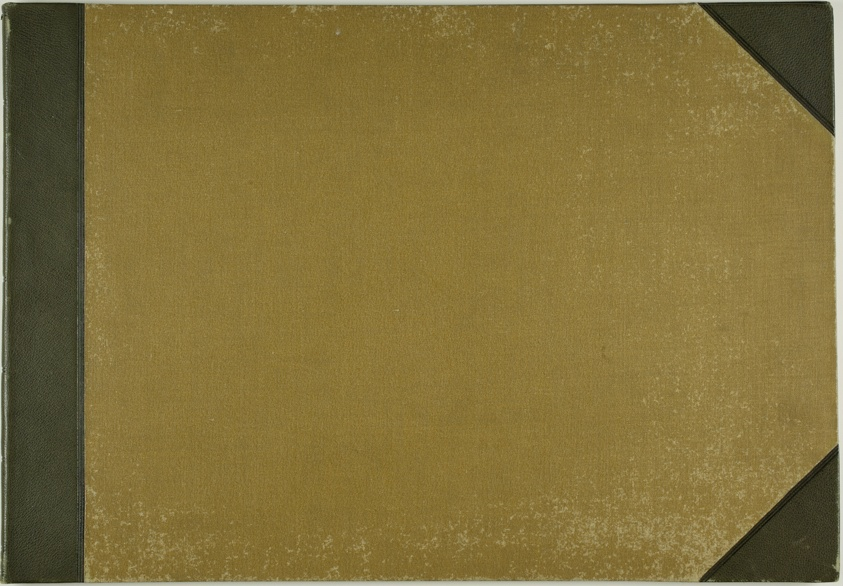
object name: Print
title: Portfolio Cover for Twelve Views in North Wales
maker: Paul Sandby (English, 1731-1809)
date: 1776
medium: Porfolio cover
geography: England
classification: portfolio; prints and drawing; print